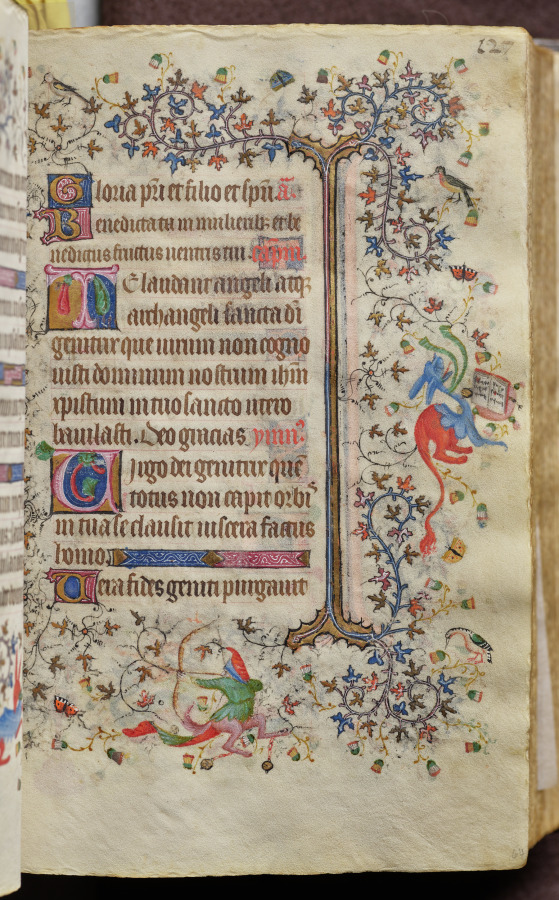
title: Hours of Charles the Noble, King of Navarre (1361-1425): fol. 64r, Text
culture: France, Paris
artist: Master of the Brussels Initials and Associates (French)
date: c. 1405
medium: ink, tempera, and gold on vellum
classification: Bound Volume